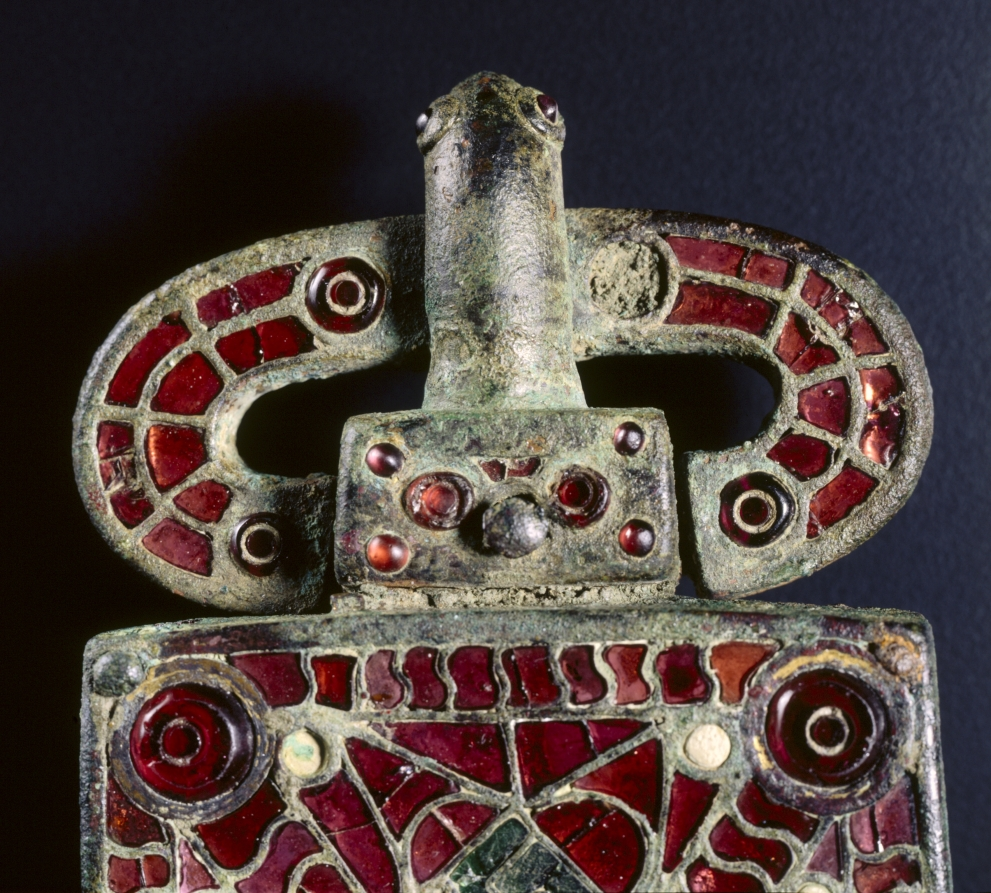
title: Belt Buckle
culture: Visigothic, Spain, Migration Period, 6th century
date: c. 525–560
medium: bronze with garnets, glass, mother of pearl, gold foil, traces of gilding; bronze and glass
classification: Jewelry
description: The art of the European Migration Period (3rd-7th centuries AD) is almost exclusively one of personal adornment-a portable art that followed men and women to their graves. Belt buckles with large rectangular attachment plates have been discovered in cemeteries across the Iberian Peninsula-now occupied by Spain and Portugal-from the period of Visigothic occupation (about AD 412-711). Their decoration varies. Finer examples, like this one, are distinguished by brilliantly inlaid semi-precious stones and colored glass. Garnets were especially prized in Visigothic society for use in cloisonné jewelry. The technique involved the fitting of carefully cut pieces of polished garnet into an intricate grid of compartments, or cloisons. This buckle is so densely inlaid with garnets that it presents a virtual "carpet" of red to the eye. These large Visigothic buckles are strikingly uniform in shape yet endlessly varied in surface design, perhaps a sign that they expressed the personal identities of their original owners. Grave excavations have shown that belt buckles of this type were made for women.